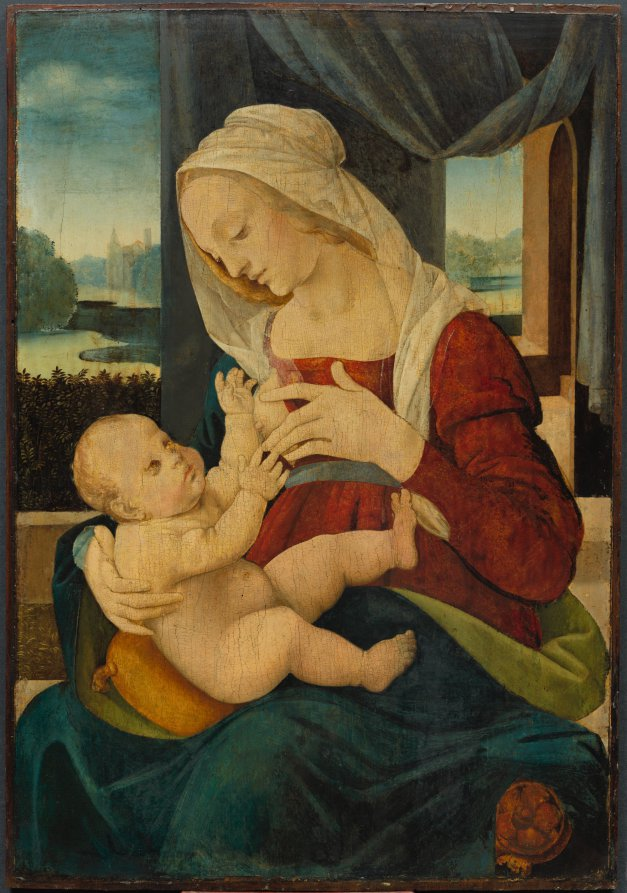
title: Virgin and Child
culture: Italy, 15th century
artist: follower of Lorenzo di Credi (Italian, 1459–1537)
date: 1400s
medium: oil on wood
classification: Painting